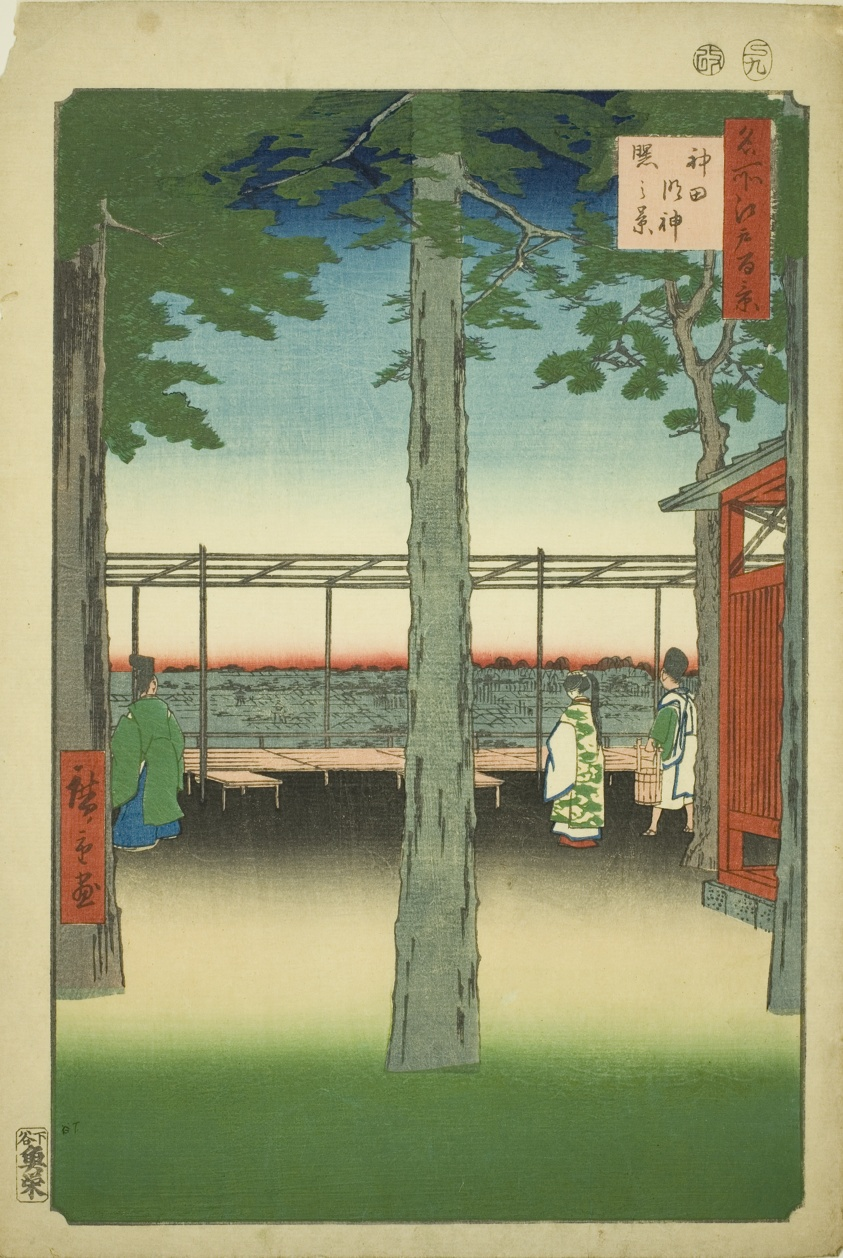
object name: Print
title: Dawn at Kanda Myojin Shrine (Kanda Myojin akebono no kei), from the series "One Hundred Famous Views of Edo (Meisho Edo hyakkei)"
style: Japanese (culture or style)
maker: Utagawa Hiroshige 歌川 広重; Japanese, 1797–1858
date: 1857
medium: Color woodblock print; oban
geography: Japan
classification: woodblock print; print; asian art